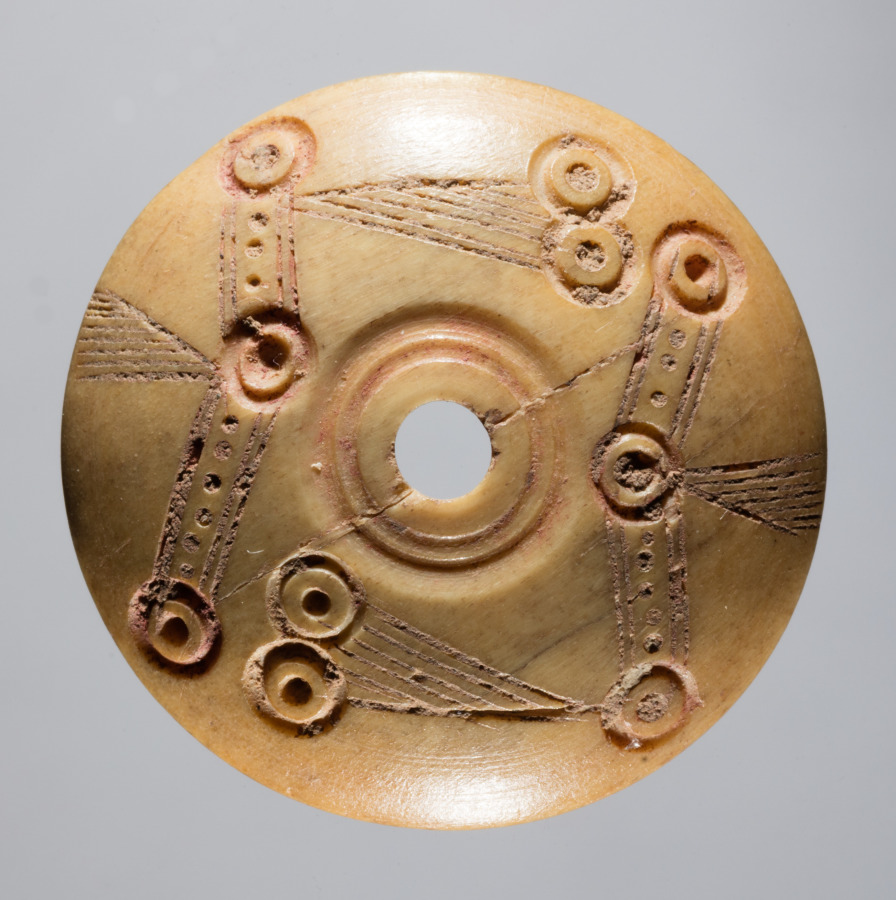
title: Spindle Whorl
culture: Iran, early Islamic period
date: 700s - 900s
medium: bone, incised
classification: Spindle Whorl